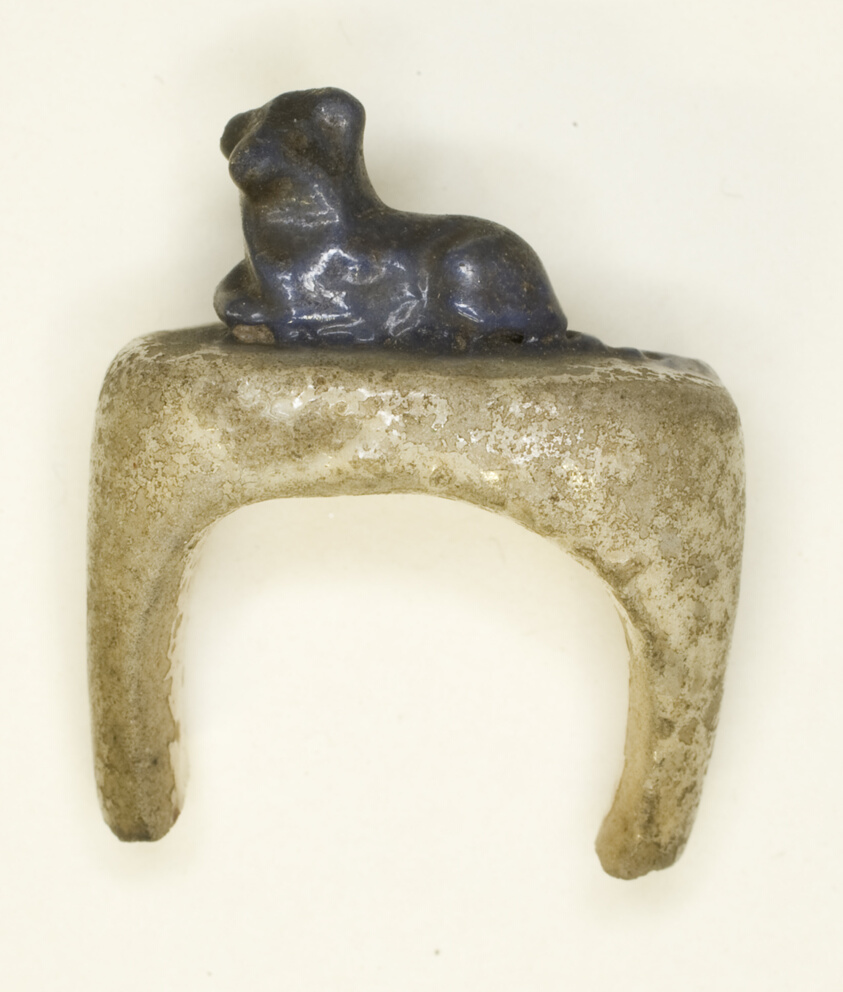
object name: Costume and Accessories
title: Ring with a Recumbent Lion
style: thirtieth dynasty, late period (egyptian)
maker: Egyptian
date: New Kingdom, Dynasty 18–20 (about 1550–1069 BCE)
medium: Glass, faience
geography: Egypt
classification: ceramics; jewelry; ancient art; costume; faïence (composite material)